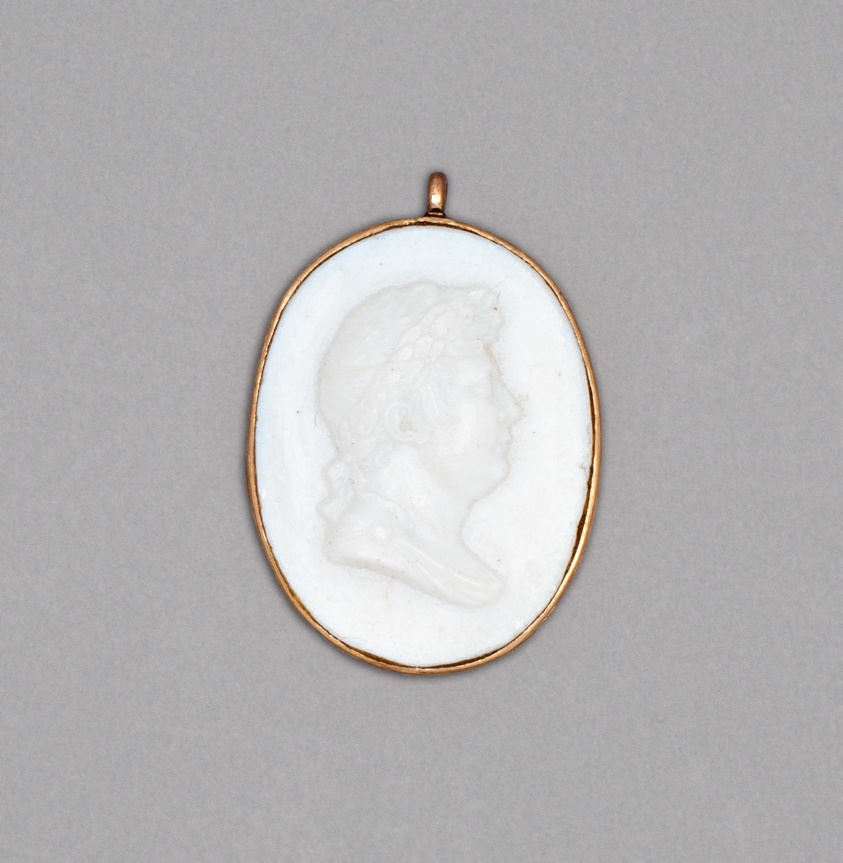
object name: Ceramics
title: Cameo Locket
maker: Wedgwood Manufactory (England, founded 1759)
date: Late 18th century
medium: Stoneware (jasperware)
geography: Burslem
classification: locket; accessories (object genre); jewelry; cameo (sculpture); stoneware; european decorative arts; ceramics